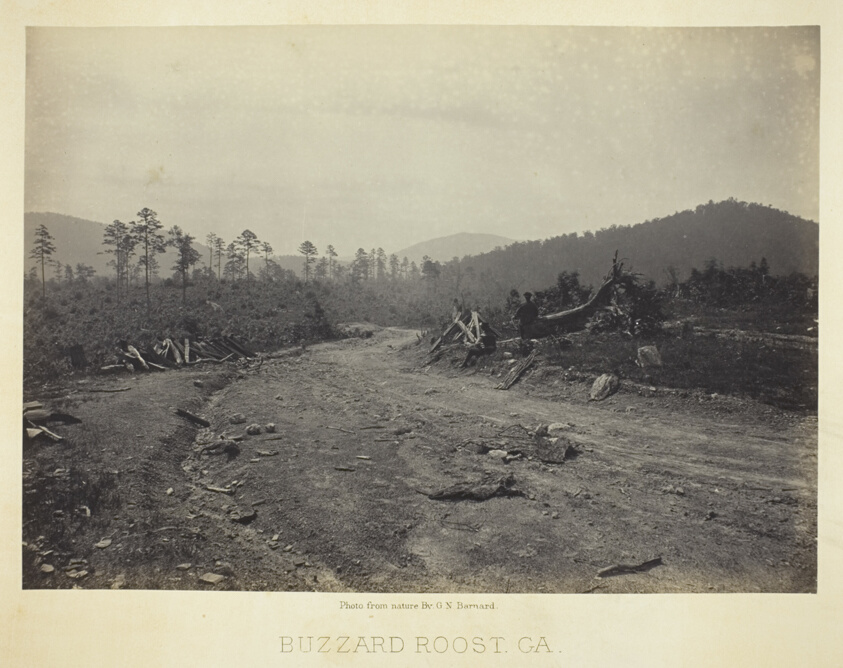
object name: Photograph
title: Buzzard Roost, GA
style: 19th century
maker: George N. Barnard (American, 1819–1902)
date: 1866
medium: Albumen print, plate 18 from the album "Photographic Views of the Sherman Campaign" (1866)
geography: United States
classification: albumen silver print; photographic process; photography; photograph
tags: Collected by Hugh Edwards, Sherman's Campaign 1866